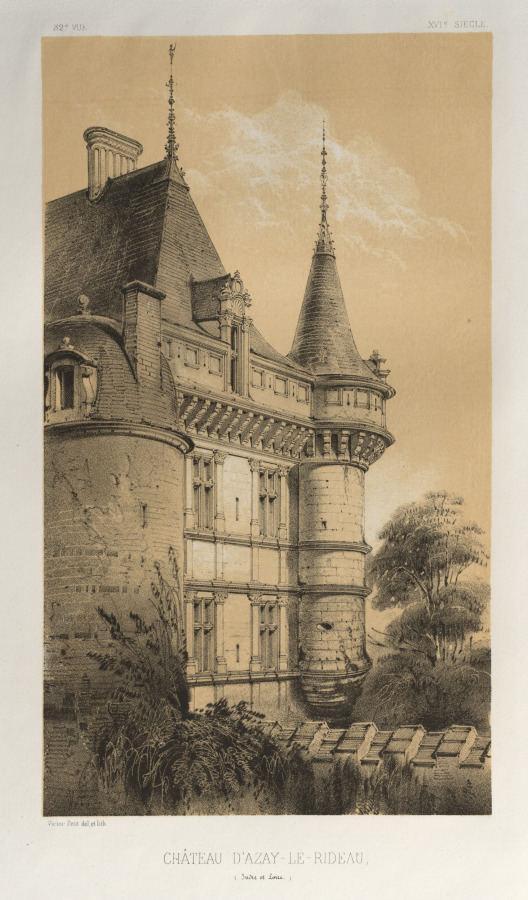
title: Architecture Pittoresque ou Monuments des xveme. Et xvieme. Siecles: Chateaux De France des XV et XVI Siecles: Pl. 32, Château D'Azay-Le-Rideau (Indre et Loire)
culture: France, 19th century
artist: Victor Petit (French, 1817–1874)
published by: Charles Boivin (publisher and editor); Lith de Godard a Paris (printer)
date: 1860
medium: lithograph with tint stone, from portfolio of 100 lithographs with tint stone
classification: Print